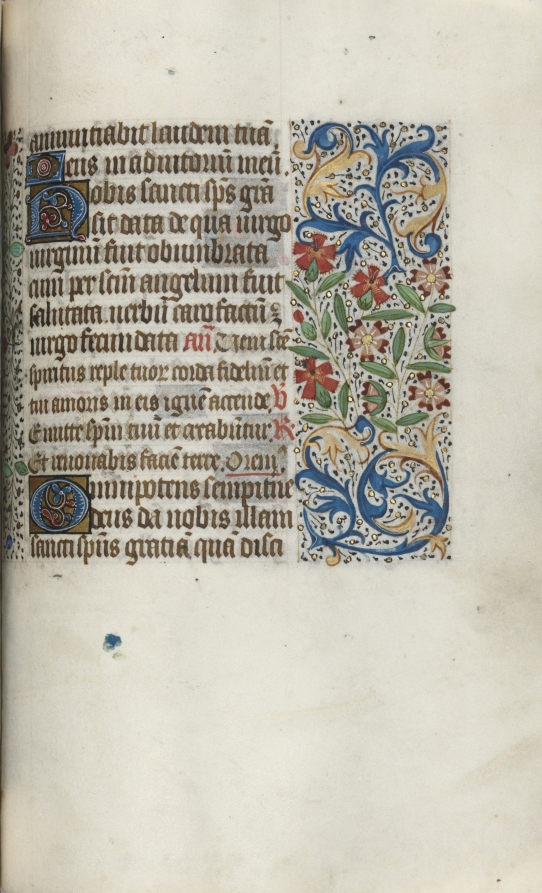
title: Book of Hours (Use of Rouen): fol. 100r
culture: France, Rouen, 15th century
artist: Master of the Geneva Latini (French, active Rouen, 1460–80)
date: c. 1470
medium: ink, tempera, and gold on vellum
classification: Bound Volume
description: In the late 1400s and early 1500s Rouen was an established and important center of book production. The city’s cathedral had a wealthy chapter that spent large sums of money to commission books and to maintain its extensive library. The stationers and booksellers would have likely been concentrated in or near the cathedral precinct. This artist, named after a manuscript now in Geneva, was Rouen’s principal illuminator during the second half of the 1400s.